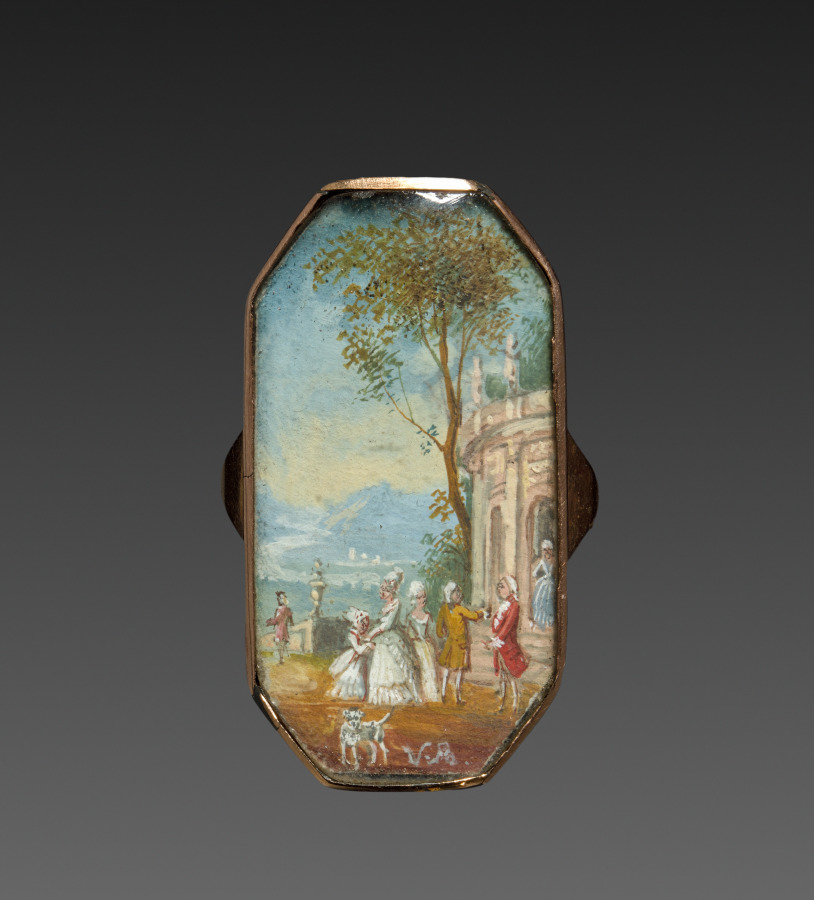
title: Miniature Ring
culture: France, 19th century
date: 1800s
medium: miniature mounted in gold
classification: Jewelry